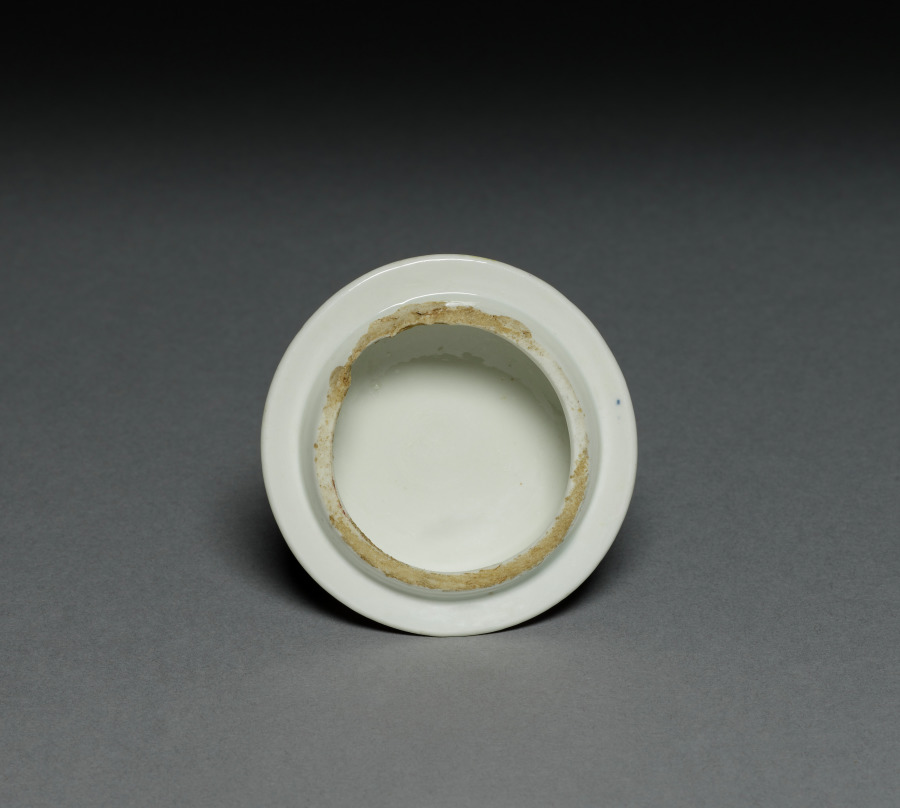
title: Chocolate Pot (lid)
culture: Germany, Berlin, late 18th century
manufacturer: Royal Porcelain Manufactory, Berlin (German)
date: late 1700s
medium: porcelain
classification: Ceramic